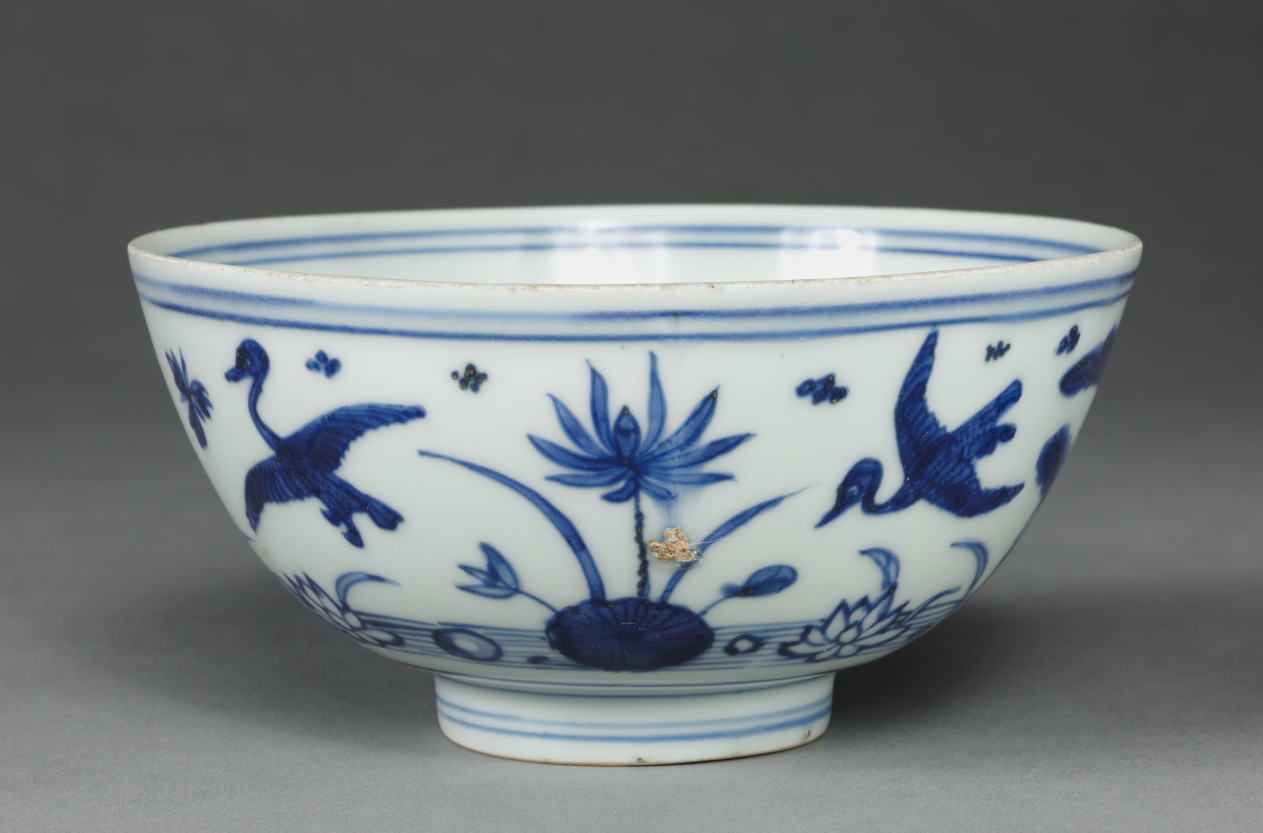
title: Bowl with Ducks over Lotus Pond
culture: China, Jiangxi province, Jingdezhen kilns, Ming dynasty (1368-1644), Wanli reign (1573-1620)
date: 1573–1620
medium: porcelain with underglaze blue decoration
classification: Ceramic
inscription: 永保長春